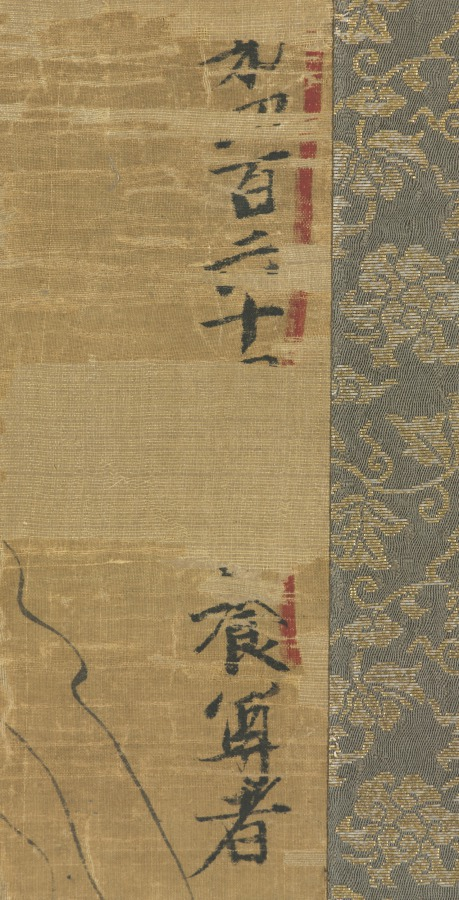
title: Arhat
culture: Korea, Goryeo dynasty (918–1392)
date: 1235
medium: Hanging scroll; ink and slight color on silk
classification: Painting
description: An arhat (Nahan in Korean), an advanced disciple of the Buddha, is represented here in profile with a halo encircling his head. This particular arhat is Segongyang jonja, numbered as the 464th of 500 arhats. He sits on a woven bamboo stool, is luring a dragon into an alms bowl. This hanging scroll is one of only about ten known works that survive today, all of which (except for Cleveland’s piece) are currently preserved in Korea or Japan.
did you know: This painting that depicts an arhat, a human being who has achieved enlightenment, used to be part of a set of 500 hanging scrolls.